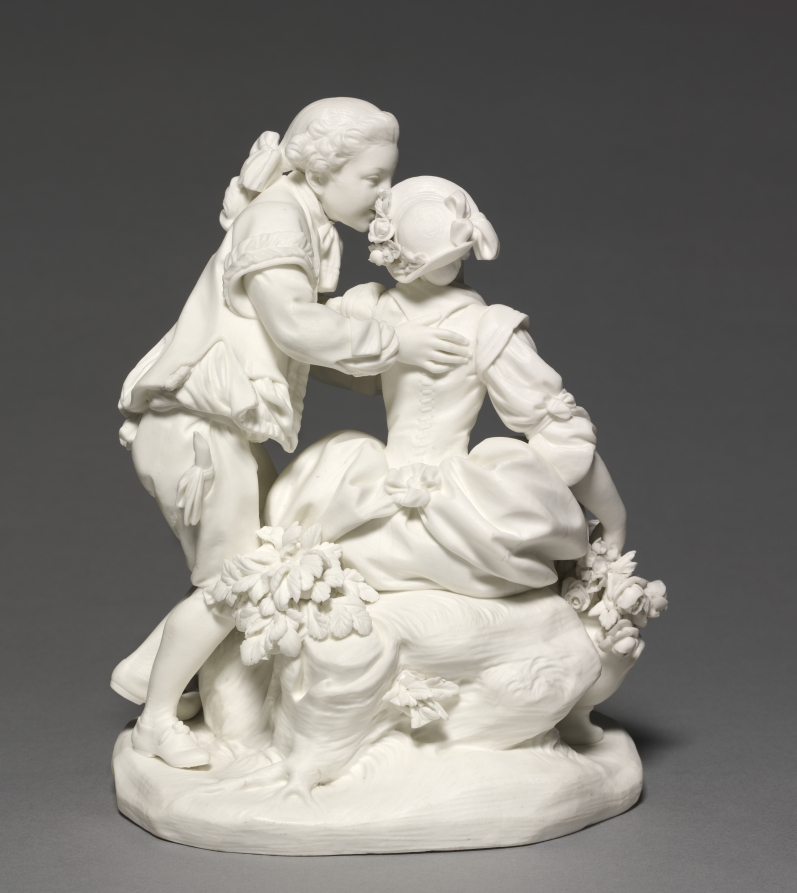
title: Figure Group of the Festival at the Chateau (La fête au château) or the Model Fidelity (La fidélité modèle)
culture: France, Sèvres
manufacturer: Sèvres Porcelain Factory (French, est. 1756)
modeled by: Etienne-Maurice Falconet (French, 1716–1791)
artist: after a design by François Boucher (French, 1703–1770)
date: 1766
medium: unglazed soft-paste porcelain (biscuit)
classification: Ceramic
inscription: 'B' incised on top of base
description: Recognizable porcelain figures and figure groups modeled after contemporary theatrical works produced by the Parisian company Opéra-Comique were produced at the Vincennes factory as early as 1752. This group illustrates a scene from a play credited to Charles-Siméon Favart, Fête au Château (Festival at the Castle), when the gardener Jacquot and his love Colette reunite.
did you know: The introduction of Sèvres porcelain figures modeled after the Opéra-Comique’s theatrical productions may have resulted from the friendship between François Boucher, designer of many early Sèvres porcelain figures, and Charles-Siméon Favart, director of the theater in 1758.